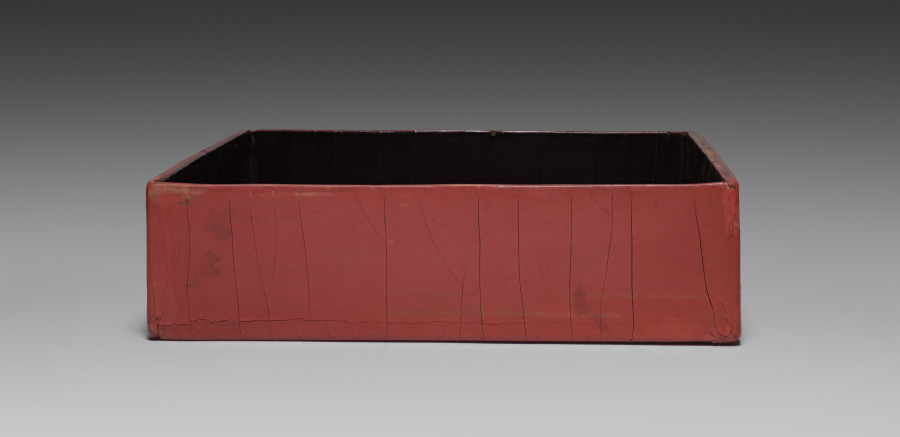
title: Drawer for a Tihong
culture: China, Ming dynasty (1368-1644), Wanli reign (1572-1620)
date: 1585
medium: carved cinnabar lacquer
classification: Lacquer